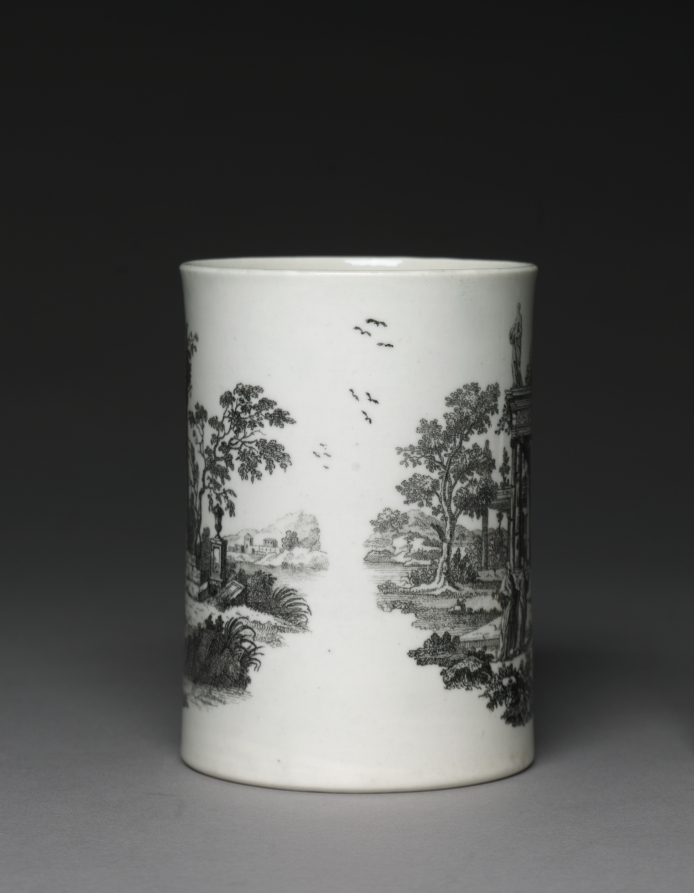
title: Mug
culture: England, Worcester, 18th century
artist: Worcester Porcelain Factory (British, established 1751)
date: c. 1760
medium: soft-paste porcelain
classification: Ceramic